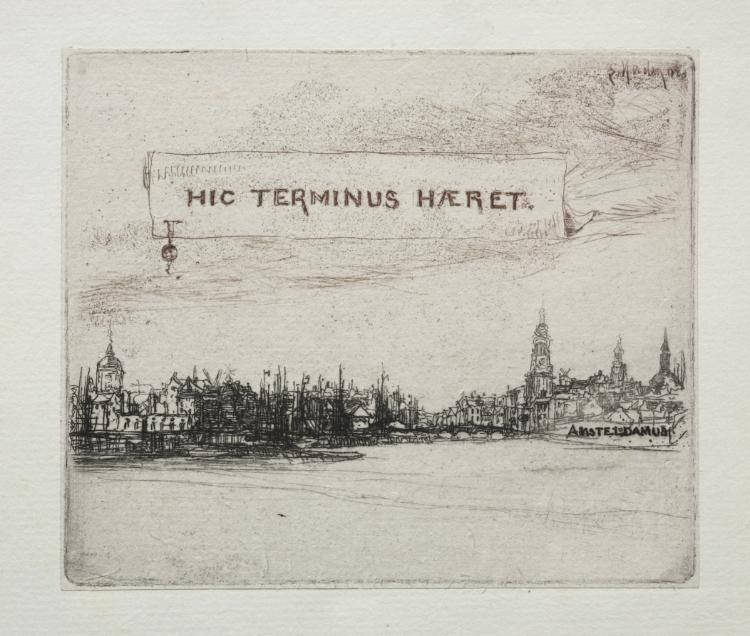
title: Amstelodamum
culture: England, 19th century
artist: Francis Seymour Haden (British, 1818–1910)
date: 1863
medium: etching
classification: Print